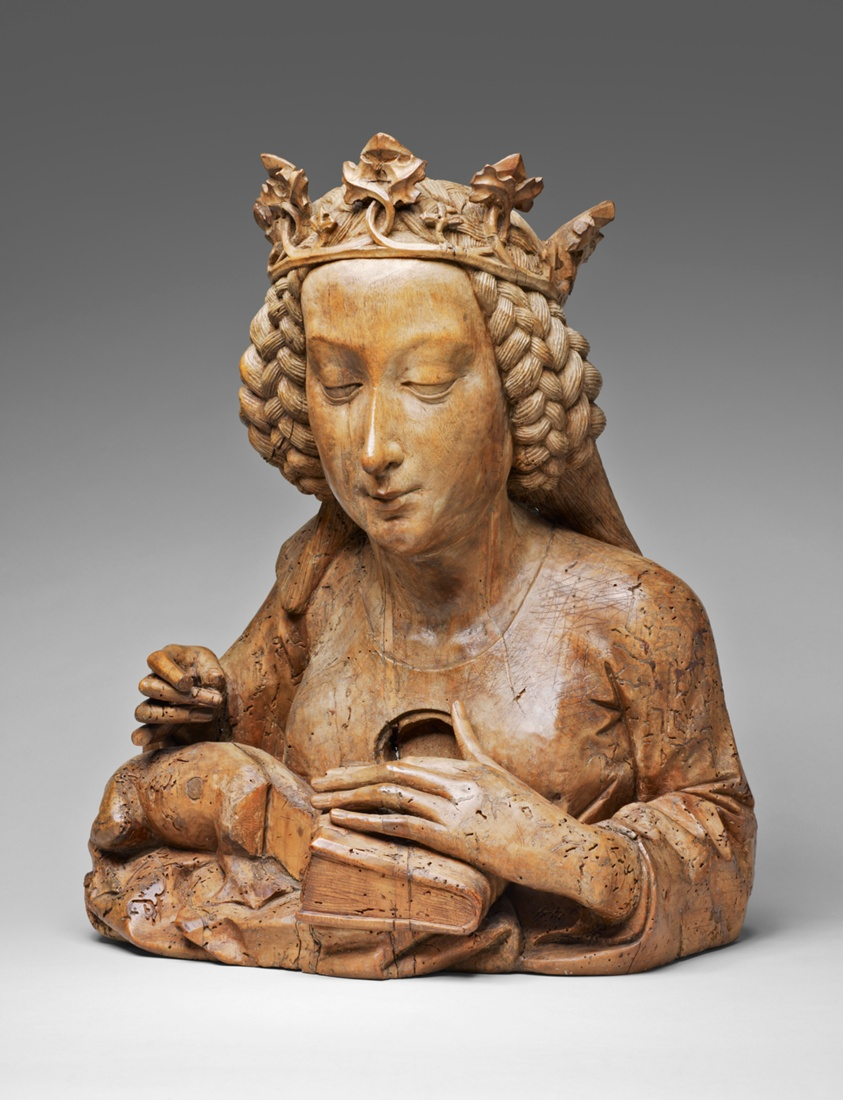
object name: Sculpture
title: Reliquary Bust of Saint Margaret of Antioch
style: 15th century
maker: Niclaus Gerhaert von Leyden (Netherlandish, active in Germany, 1462–73); Workshop of Niclaus Gerhaert von Leyden (Netherlandish, active in Germany, 1462–73)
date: 1465/70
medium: Walnut with traces of 19th-century polychromy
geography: Netherlands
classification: reliquary; bust/head; sculpture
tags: Saint Margaret, busts, Christian subjects, Christianity, crowns, Devotion, religion, religious, religious figures, reliquary, saints, vessels, woman